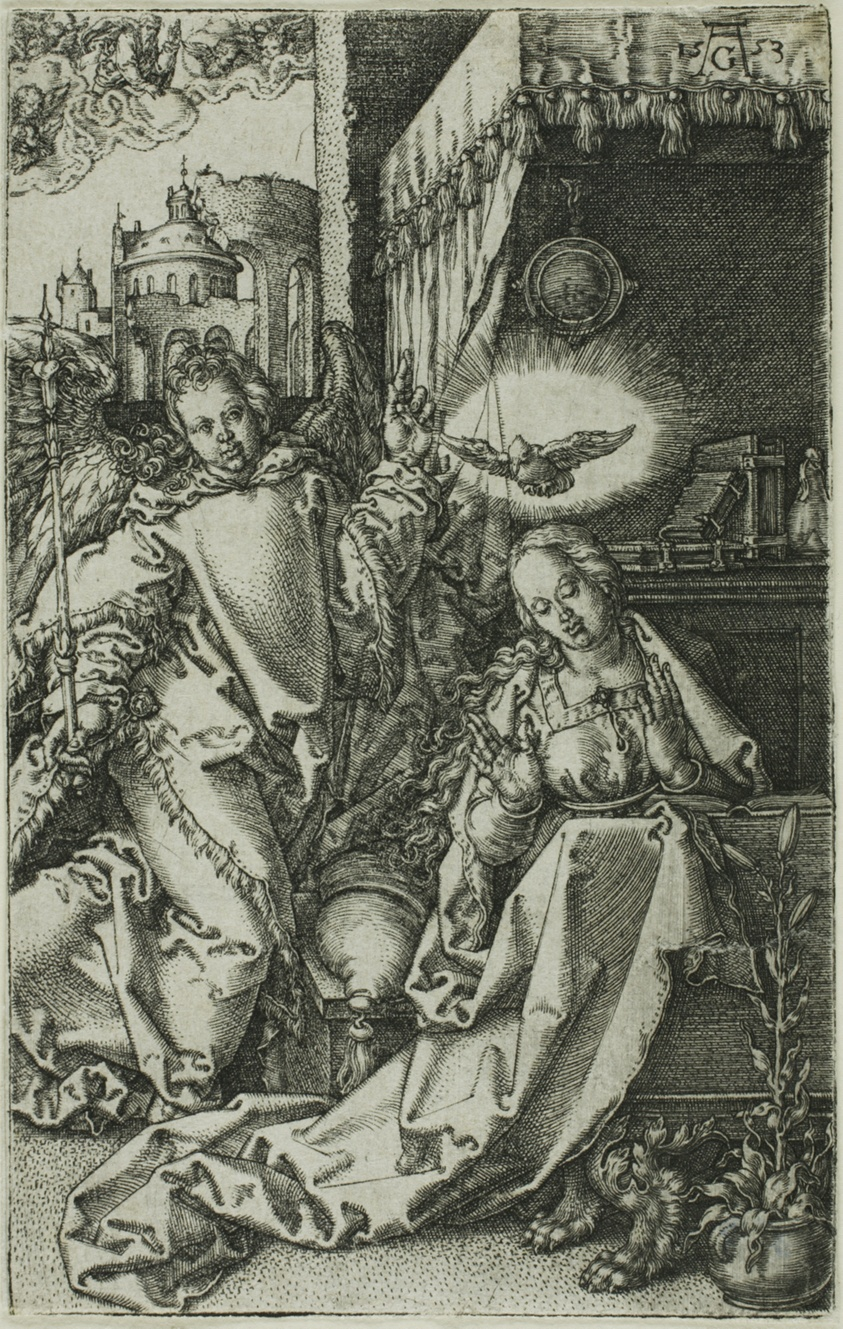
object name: Print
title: The Annunciation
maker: Heinrich Aldegrever (German, 1502-c.1560)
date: 1553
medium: Engraving in black on ivory laid paper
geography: Germany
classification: engraving; print; prints and drawing